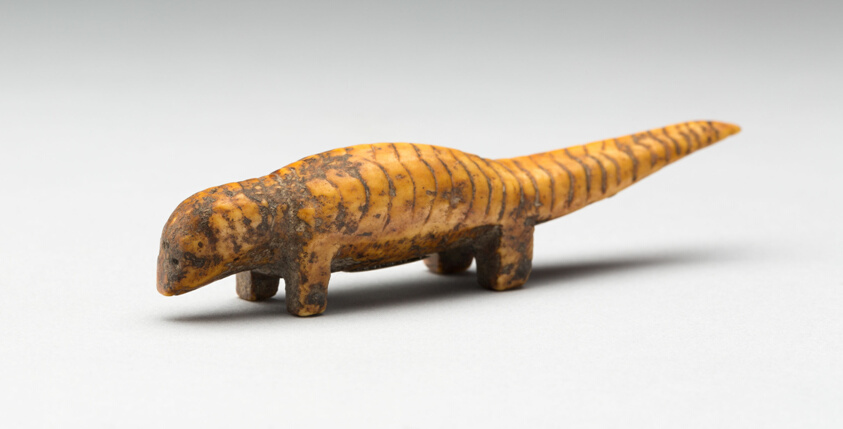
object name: Sculpture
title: Animal in the Form of a Pangolin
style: lega, Arts of Africa, Central Africa, african Art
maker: Lega; Democratic Republic of the Congo; Central Africa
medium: Bone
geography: Democratic Republic of the Congo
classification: bone; arts of Africa; sculpture; african art